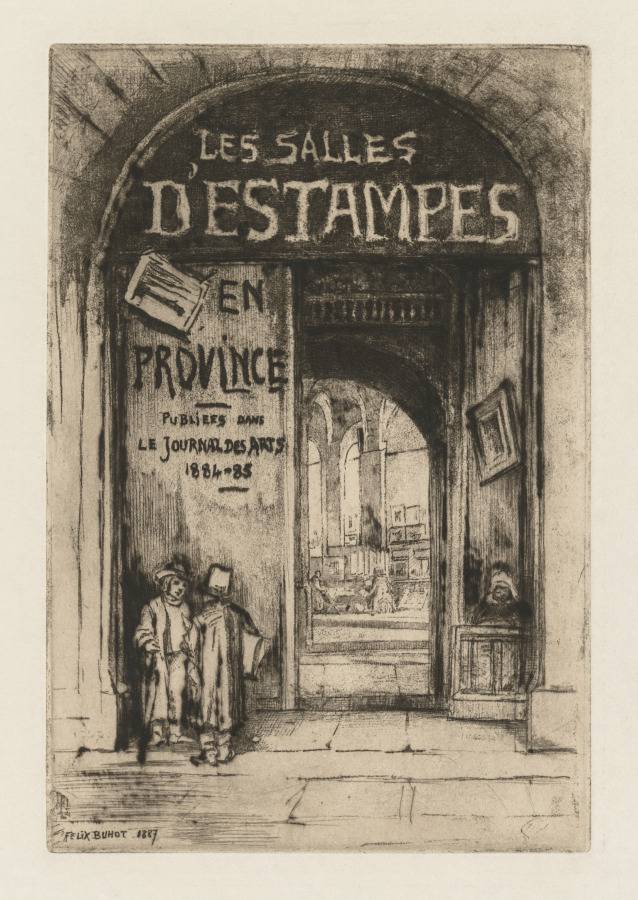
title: Les Salles d'Estampes en Province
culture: France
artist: Félix Hilaire Buhot (French, 1847–1898)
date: 1877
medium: etching on wove paper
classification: Print